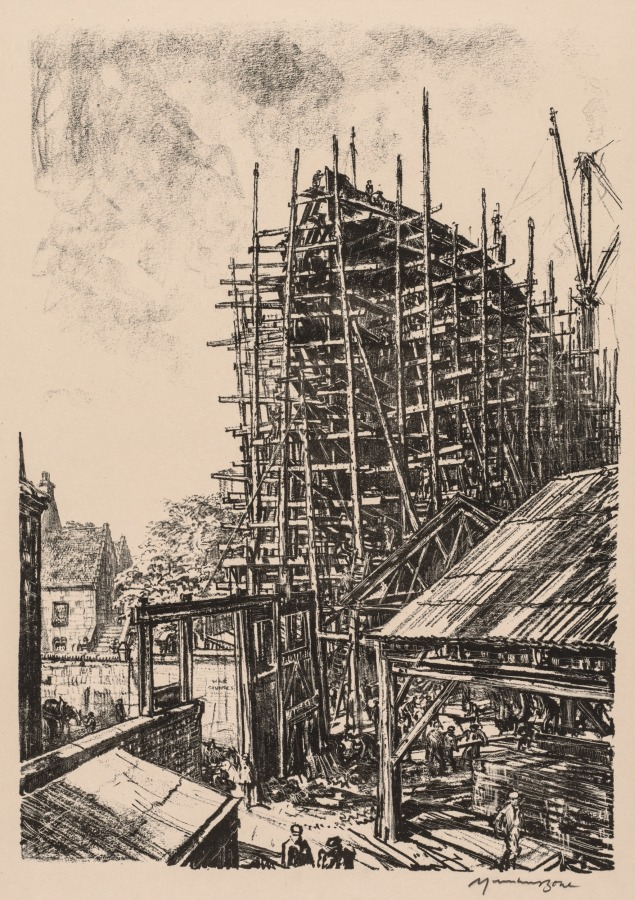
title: On the Clyde, 1917-1918: Building a Liner at Greenock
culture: England, 20th century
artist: Muirhead Bone (British, 1876–1953)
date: 1917–1918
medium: lithograph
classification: Print